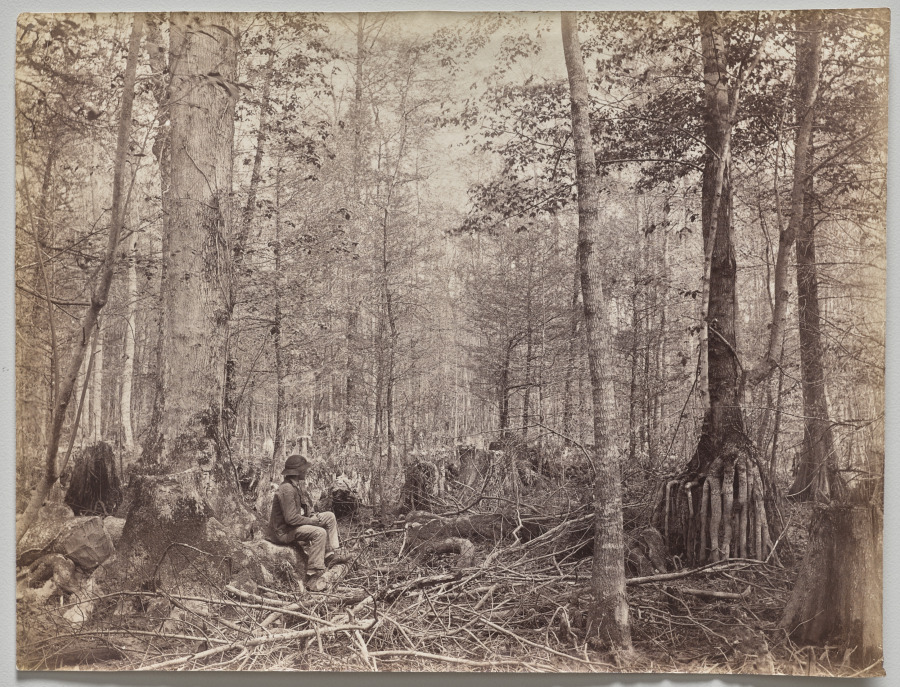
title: Great Dismal Swamp, Virginia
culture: America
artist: Israel Cook Russell (American, 1852–1906)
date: c. 1872–90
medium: albumen print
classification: Photograph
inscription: Handwritten in graphite on verso of photograph and mat: "C.H. Merriam, attrib.; Dismal Swamp, NC, c. 1880 (?); GE 1890.6; 173"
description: Israel Cook Russell’s view of the Great Dismal Swamp, which straddles the border between Virginia and North Carolina, evokes both the locale’s abundance of timber and its sense of desolation. Russell, a celebrated geologist, took care to express the geological and biological forces that shaped landscapes but also to create images of artistic value.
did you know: From the 1700s through the Civil War, the Great Dismal Swamp’s timber was harvested by slave labor, yet the swamp also housed numerous people who had escaped slavery.